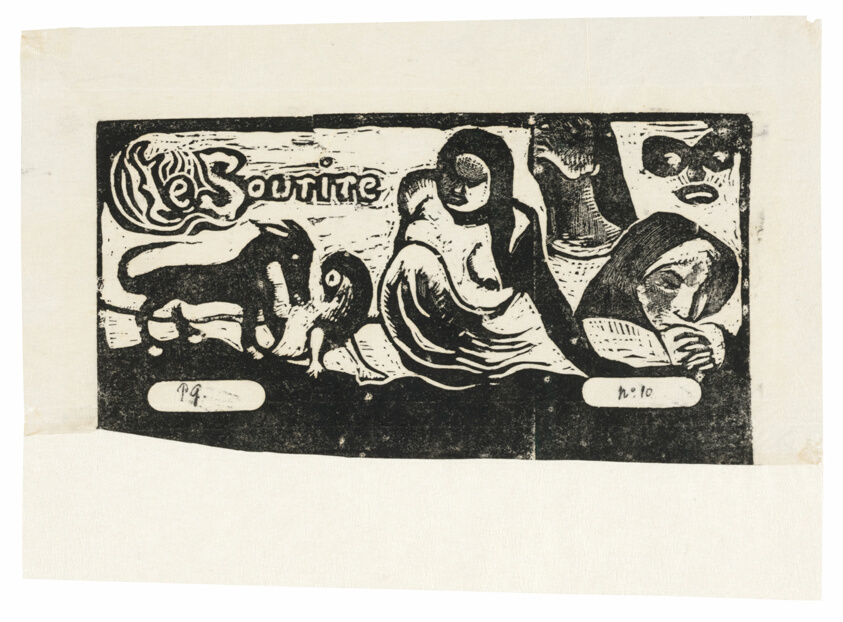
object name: Print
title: Three People, a Mask, a Fox and a Bird, headpiece for Le sourire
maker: Paul Gauguin (French, 1848-1903)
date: 1899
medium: Wood-block print in black ink on thin ivory laid Japanese paper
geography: France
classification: woodcut; print; prints and drawing